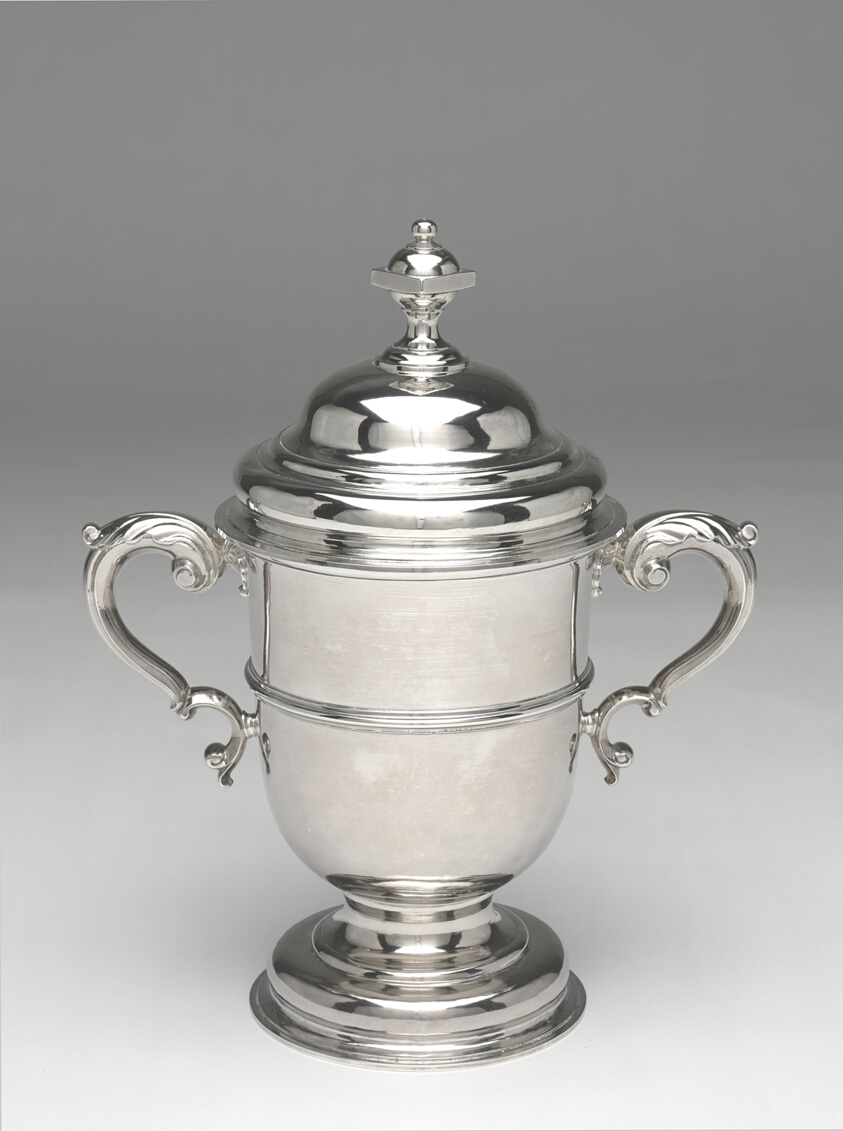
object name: Metalwork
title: Covered Cup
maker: Myer Myers; American, 1723–1795; New York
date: 1764–75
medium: Silver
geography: New York City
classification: drinking vessel; silver; american decorative arts; american arts; decorative arts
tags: dining, drinking